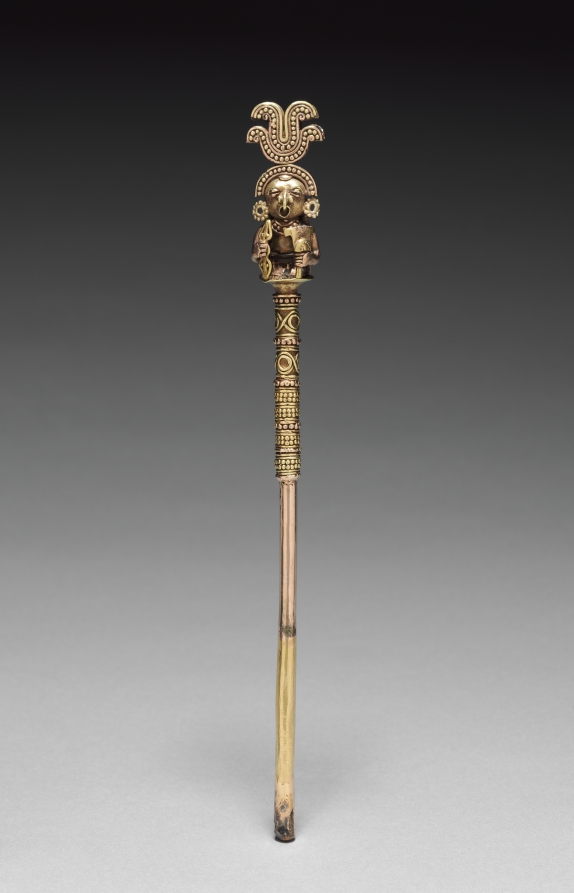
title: Lime Dipper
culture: Colombia, Calima region, Yotoco style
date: c. 1–800 CE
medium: gold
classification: Metalwork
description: Coca-leaf chewing was a widespread ritual in ancient South America. Utensils included a container and a dipper or spoon for powdered lime (made from seashells), added to the coca to enhance its gentle, stimulating effect. Colombian cultures are especially known for transforming these utensils into works of art made of precious metal. The image on the tallest dipper is wonderfully complex. A serpent coils at the bottom, beneath a snarling animal with a huge, vertical tail. This animal has a tiny monkey on its back; the monkey also has a huge tail, which rests on the first animal's head like a headdress. This intricate image was created with the lost-wax casting process.